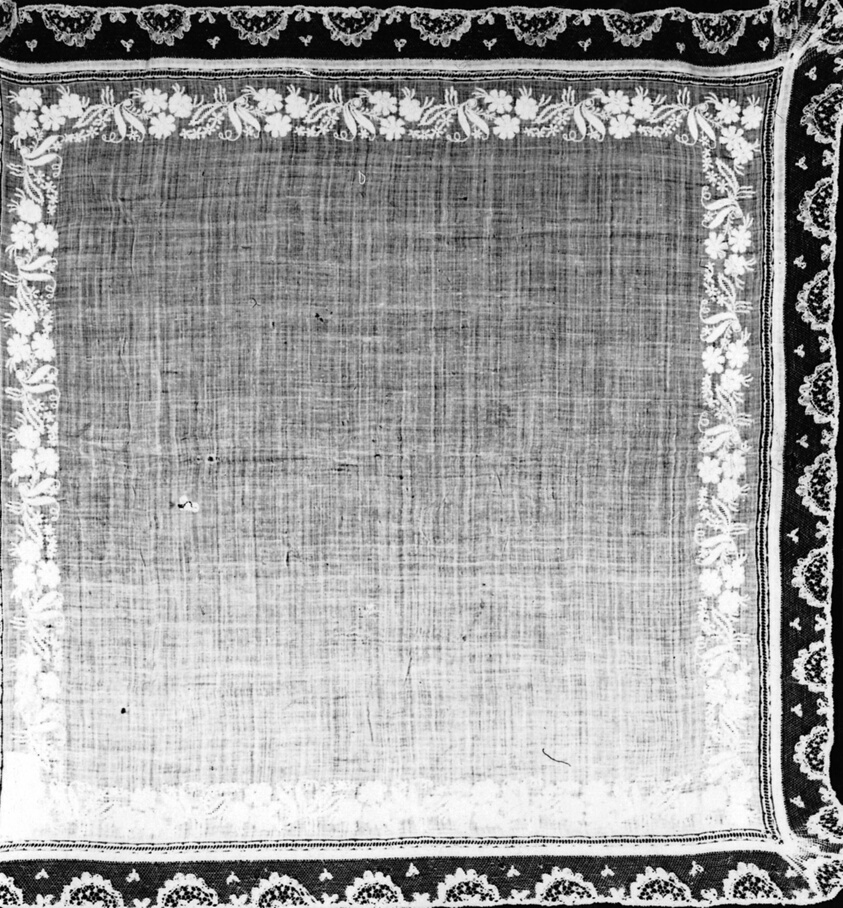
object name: Textile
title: Handkerchief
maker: England, Midland Counties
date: 1840s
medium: Linen, plain weave; pulled thread work embroidered with cotton in back, buttonhole, double and overcast stitches; embroidered with cotton in back, eyelet, padded overcast and padded satin stitches; French knots; edged with cotton, bobbin straight lace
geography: England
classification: textile; needlework (visual works)